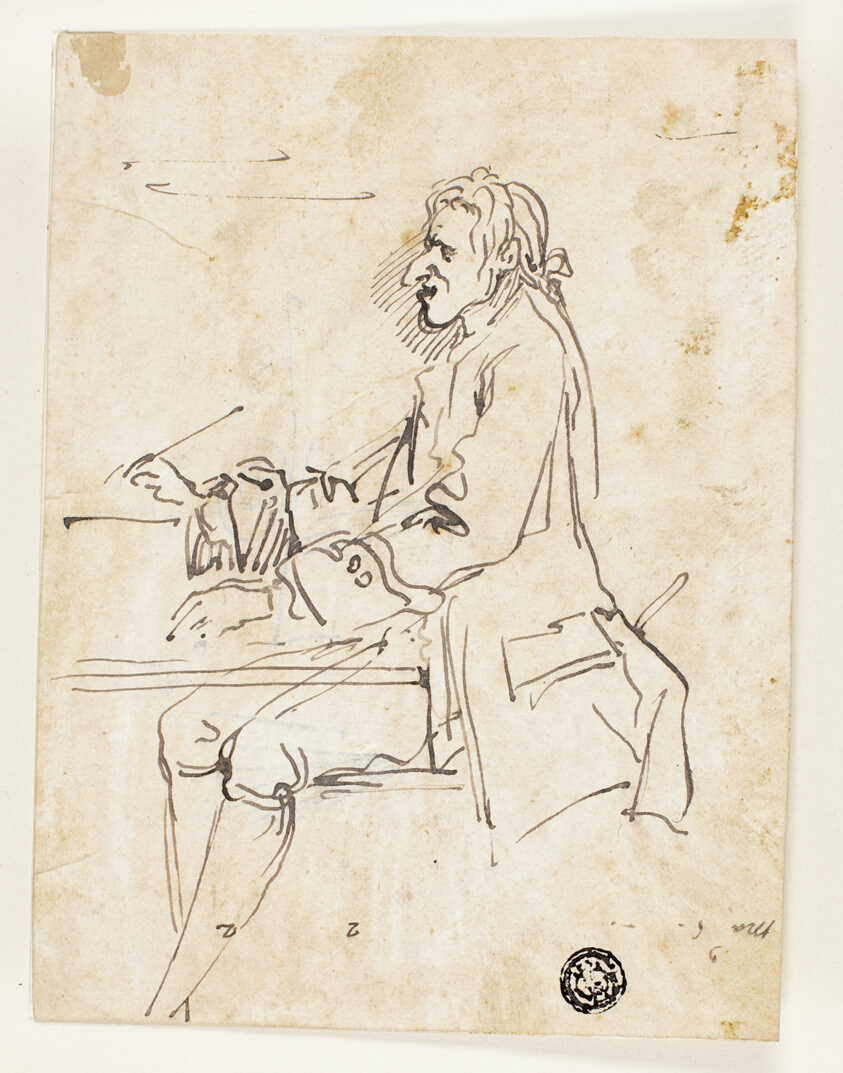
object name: Drawing and Watercolor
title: Caricature of Man Writing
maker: Carlo Marchionni (Italian, 1702-1786); or Pier Leone Ghezzi (Italian, 1674-1755)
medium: Pen and brown ink on ivory laid paper, laid down on ivory wove paper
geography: Italy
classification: pen and ink drawings; drawings (visual works); prints and drawing